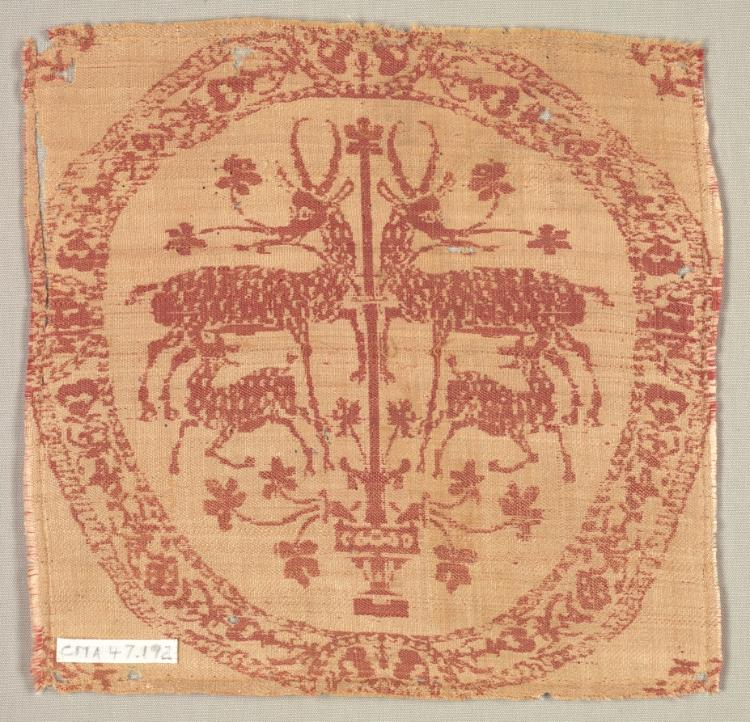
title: Square Ornament from a Tunic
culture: Egypt or Syria, Umayyad period (661–750) or Abbasid period (750–1258)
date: 700s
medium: Silk; complementary weft-faced twill weave with inner warps (samite)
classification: Textile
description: The folded edges on all four sides of this luxury silk fragment indicate that it decorated a unisex linen tunic. The symmetrical deer with suckling fawn flanking a simplified central tree of life continues an ancient theme in a naturalistic style. The roundel is connected on all four sides and displays heart-shaped floral borders. This fragment is said to have been found in Akhmim, Egypt, south of Cairo, where, during the 1880s, numerous related silk fragments were excavated.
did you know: Seen as a prized decoration, designs like this were often cut out of older textiles and stitched onto unisex linen tunics.